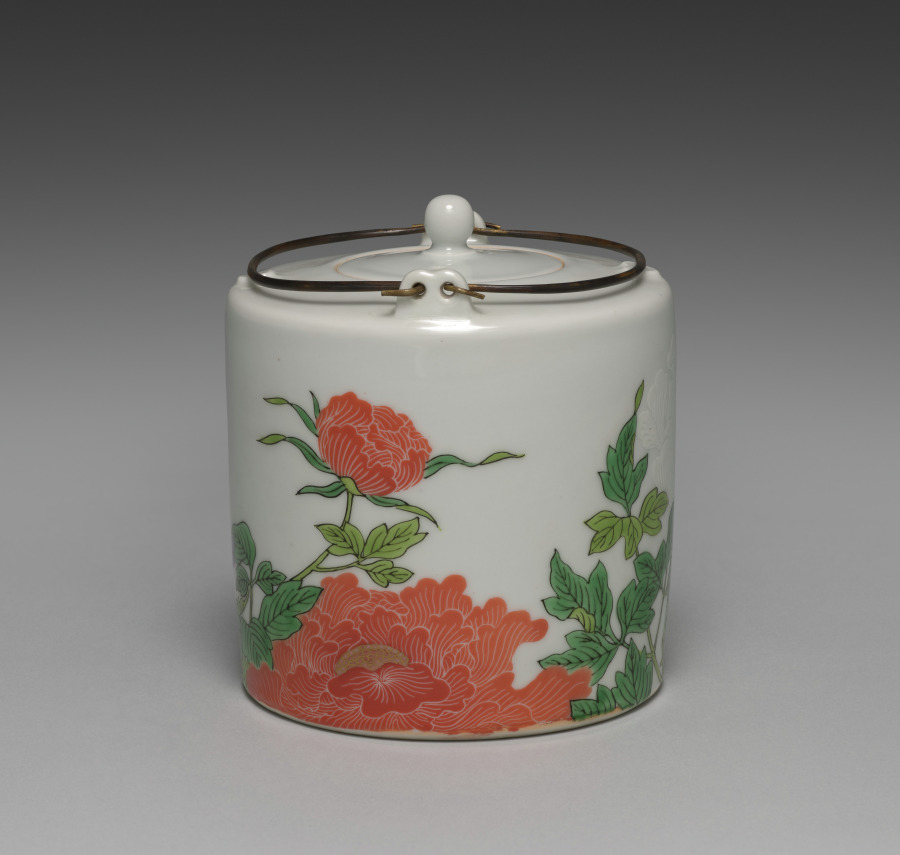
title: Sake Pourer with Flowers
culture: Japan, Meiji period (1868–1912)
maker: Seifū Yohei III (Japanese, 1851–1914)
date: 1893–1914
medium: Porcelain with molded design, overglaze color enamel, and metal handles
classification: Ceramic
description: This sake pourer is of a type called a chōshi. It is elaborately decorated with flowers in overglaze enamels in several colors, including black for the contour lines of leaves and stems; orange, white, gold, and two shades of green for the peonies; and purple for the thistles. The white blossoms have been built up with white enamel, then incised for a white-on-white eect; the orange and purple use an absence of color to produce the contours of individual petals. Yohei III referred to his works in multicolor overglaze enamels as “hundred flower brocades” (hyakka nishiki). Two small nyoi (C. ruyi) staff-head motifs, molded in clay and applied to either side of the lid, create handle rests, as well as natural places for the thumb and index finger of one hand to rest, so one can both secure the lid and steady the pour, while the handles are held in the other hand. The top of a nyoi staff resembles the curled cap of the reishi. Such scepters are imagined to be found in the hands of sages, Daoist immortals, or Buddhist deities and connote lofty goings-on and favorable circumstances. Since this sake pourer is unsigned, it may have been made for imperial family members to give as a gift.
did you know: This sake pourer with purple thistles and orange peonies shows off Seifū Yohei III’s technique of enamels painted over the glaze.